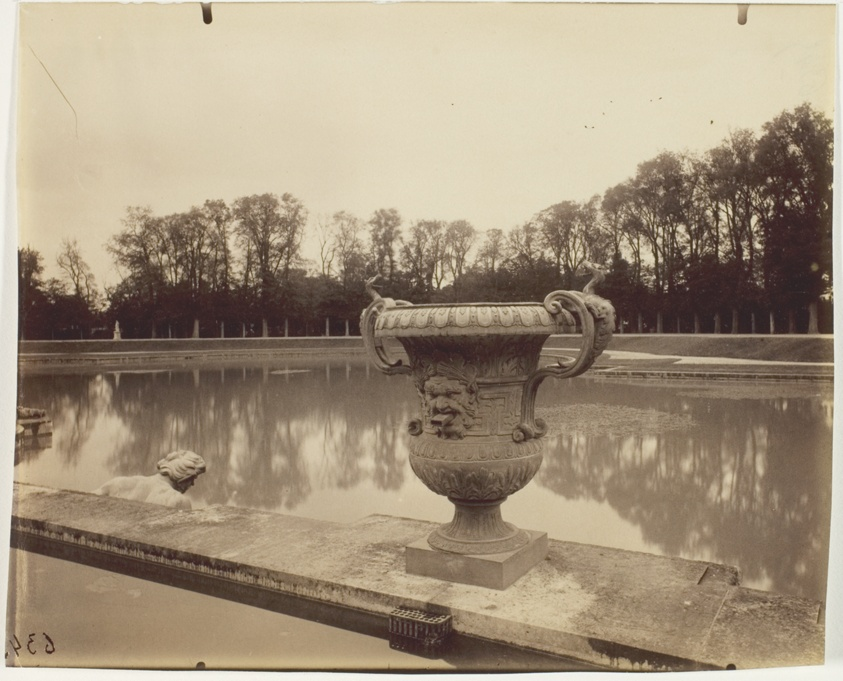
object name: Photograph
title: Versailles, Bassin de Neptune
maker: Jean-Eugène-Auguste Atget (French, 1857–1927)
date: 1902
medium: Albumen print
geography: France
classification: albumen silver print; photographic process; photography; photograph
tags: Collected by Hugh Edwards